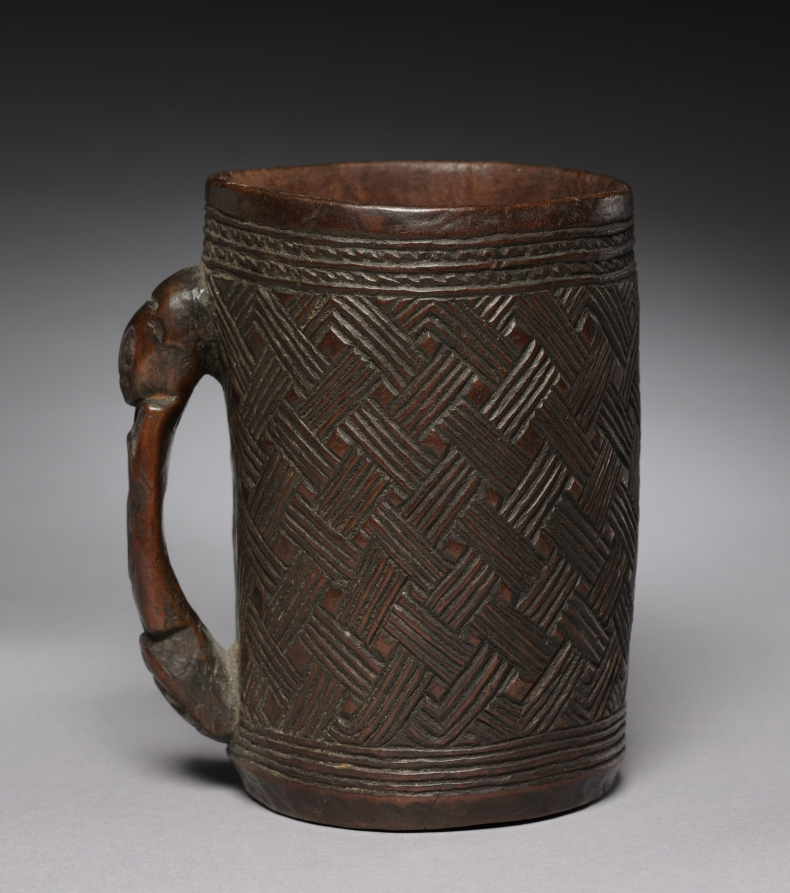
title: Cup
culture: Africa, Central Africa, Democratic Republic of the Congo, Kuba-style maker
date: early 1900s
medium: Wood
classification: Vessels